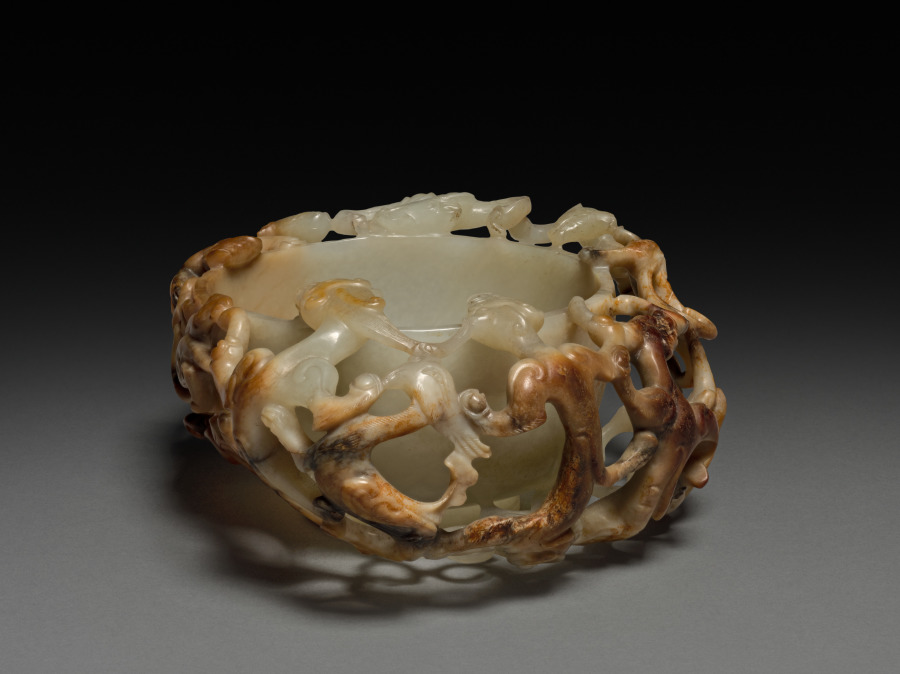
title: Cup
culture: China, Qing dynasty (1644–1911), Qianlong reign (1736–95)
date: 1736–95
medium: jade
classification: Jade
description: In the Qing dynasty, luxury items became more affordable to larger parts of the society, including women, merchants, and literati in nonofficial positions. Imperial patronage and a growing urban population also encouraged consumption of luxury goods and local craftmanship. This cup with open-work interlacing dragons shows the creative mind of the skilled artisan who carved it from a round piece of jade.